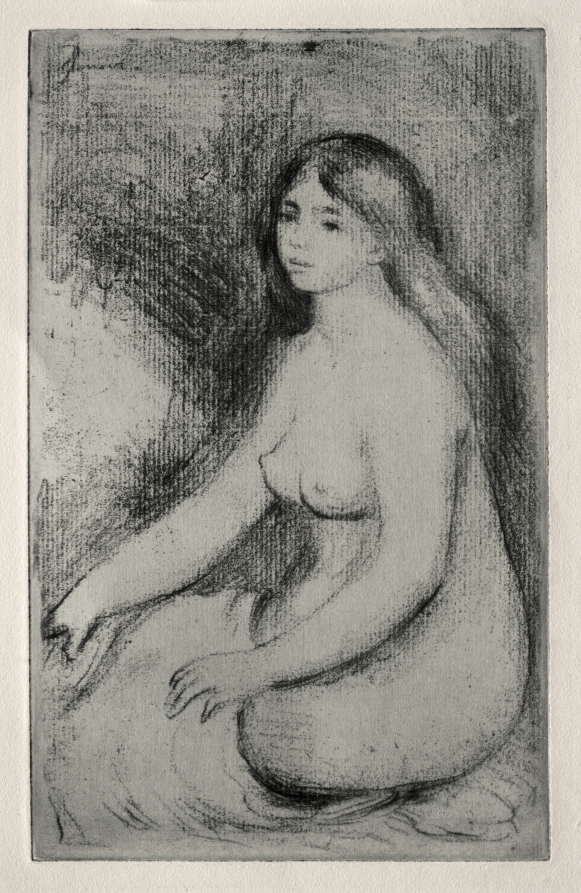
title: Baigneuse assise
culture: France, late 19th-early 20th Century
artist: Pierre-Auguste Renoir (French, 1841–1919)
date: c. 1905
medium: softground etching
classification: Print